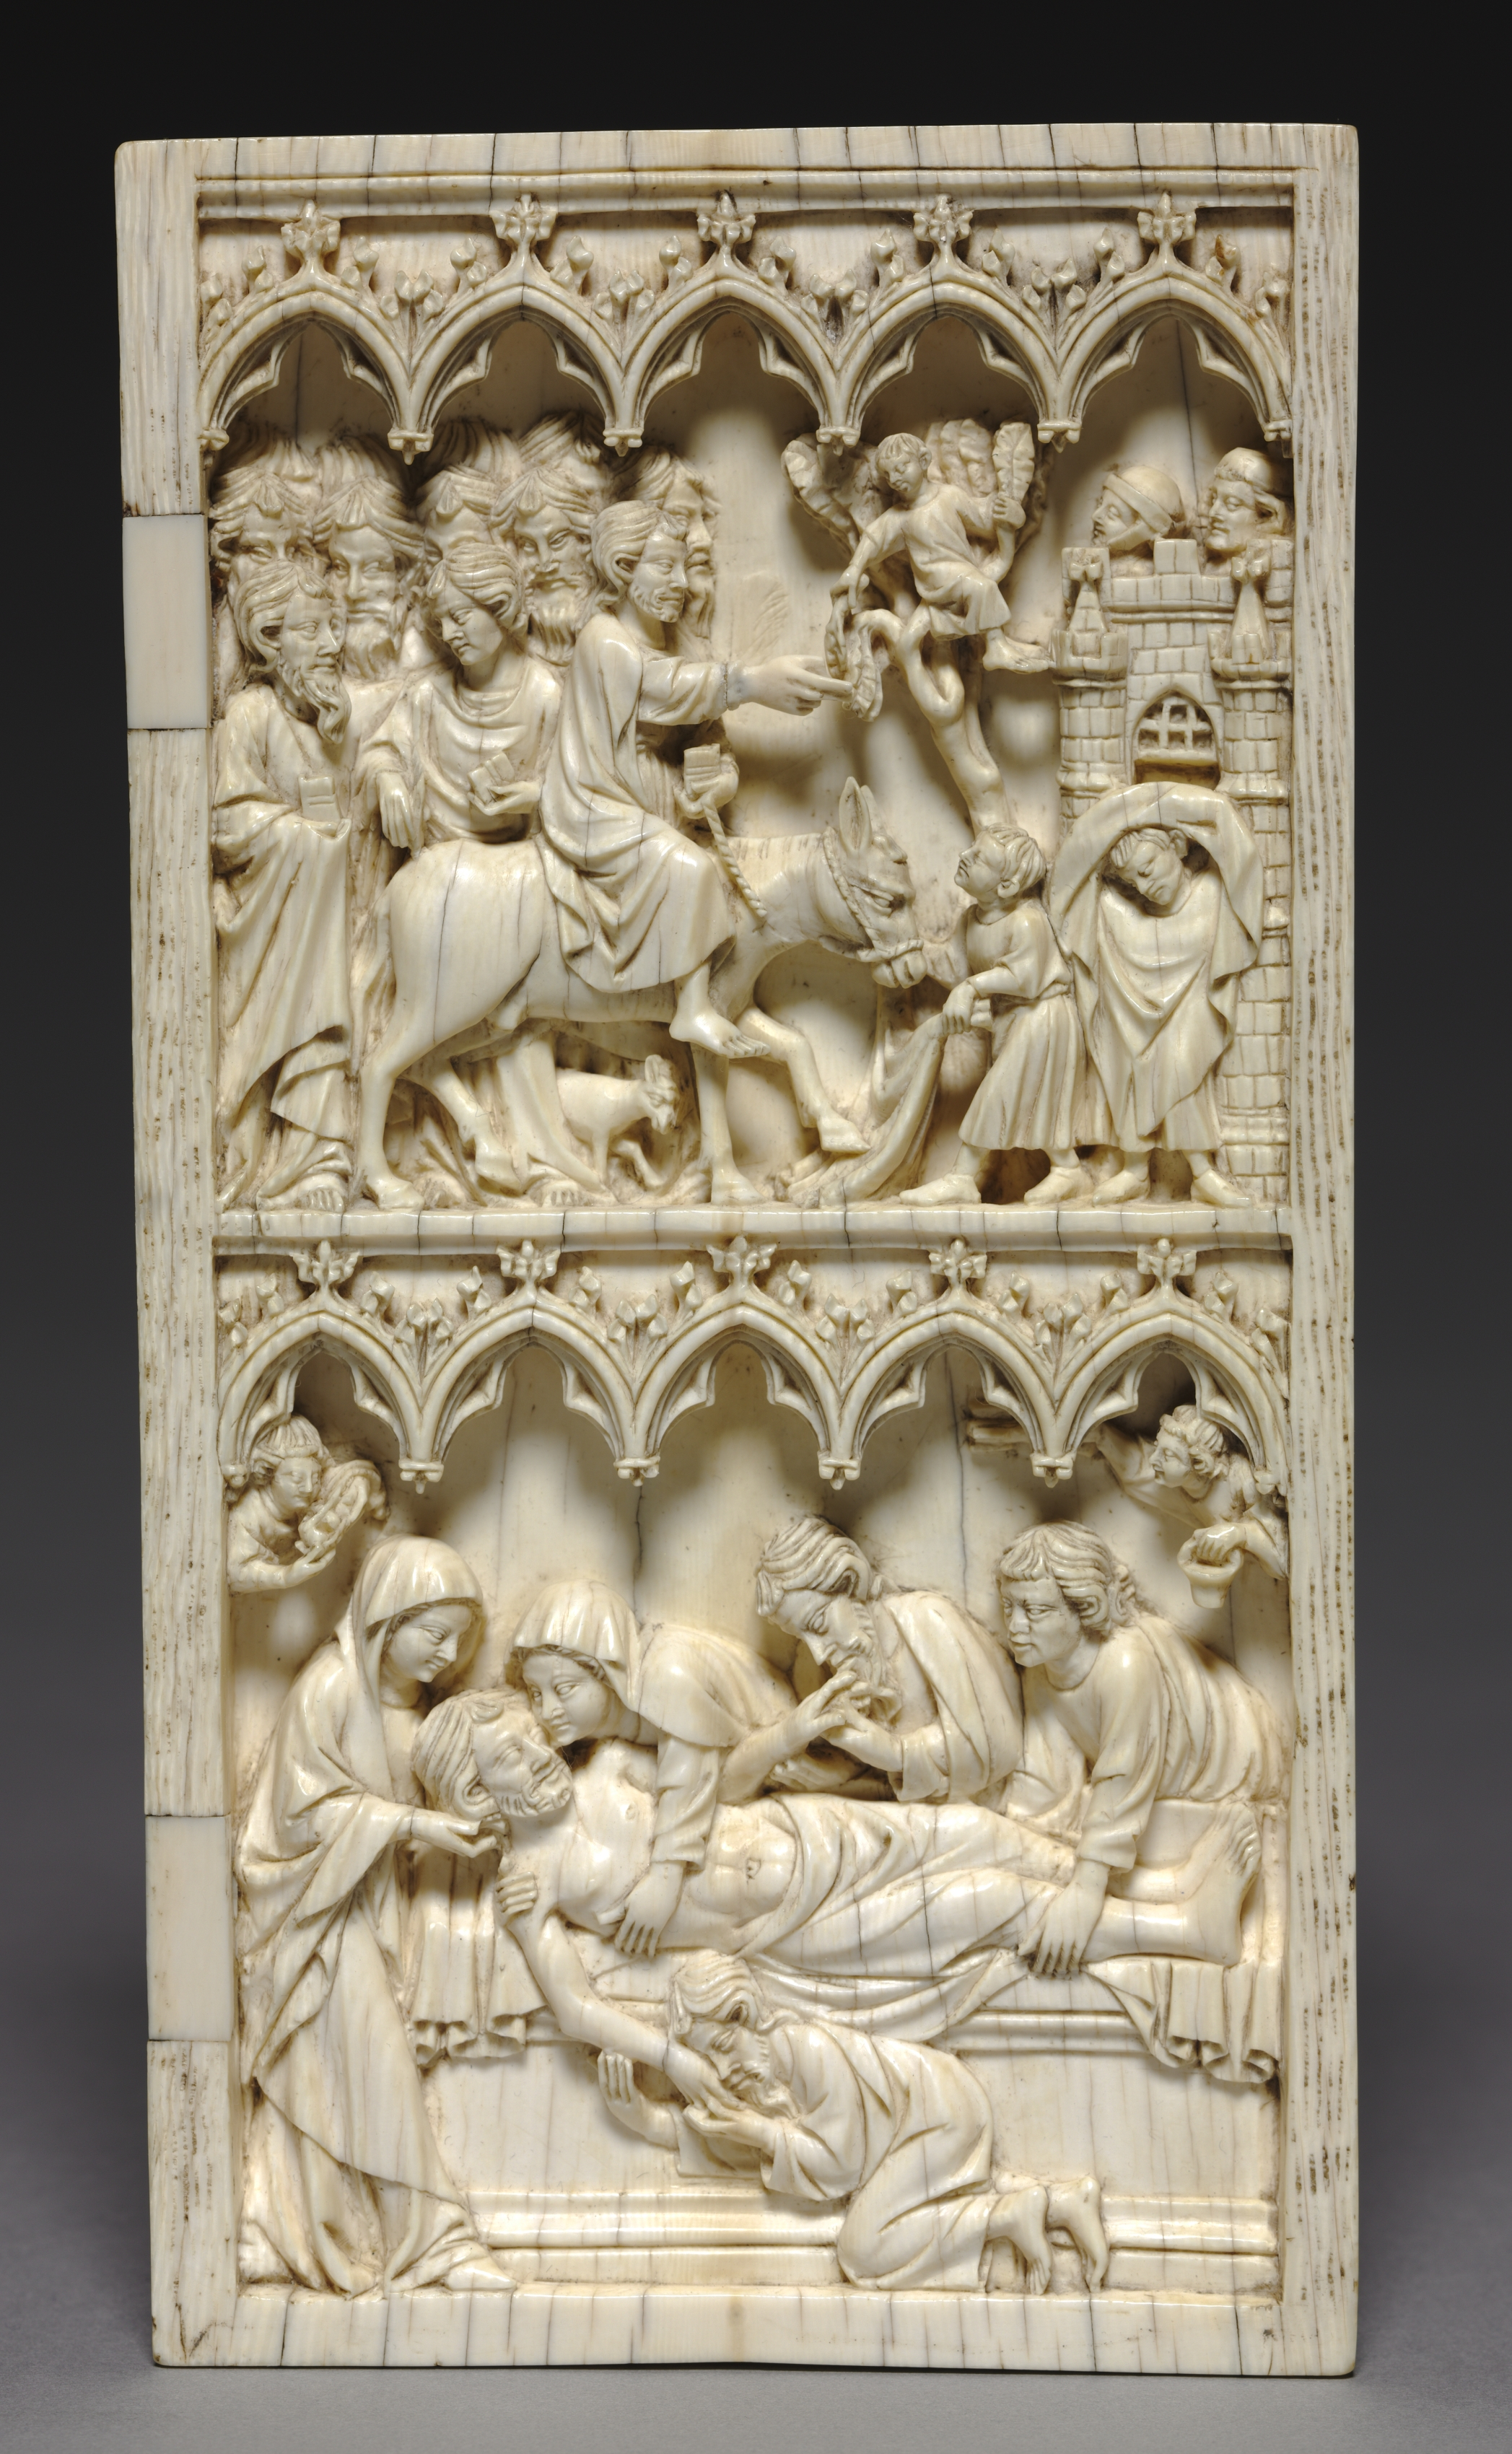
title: Diptych with Scenes from the Life of Christ (left wing: Raising of Lazarus and Crucifixion)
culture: Germany, Thuringia or Saxony, 14th century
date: c. 1350–1375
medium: ivory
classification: Ivory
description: Ivory diptychs (two panels hinged together) were used for private devotion by their aristocratic owners. The scenes represented here are Christ’s Entry into Jerusalem, the Raising of Lazarus, the Crucifixion, and Christ’s Entombment. They suggest choices made by the original owner who wished to contemplate these aspects of Christ’s passion.